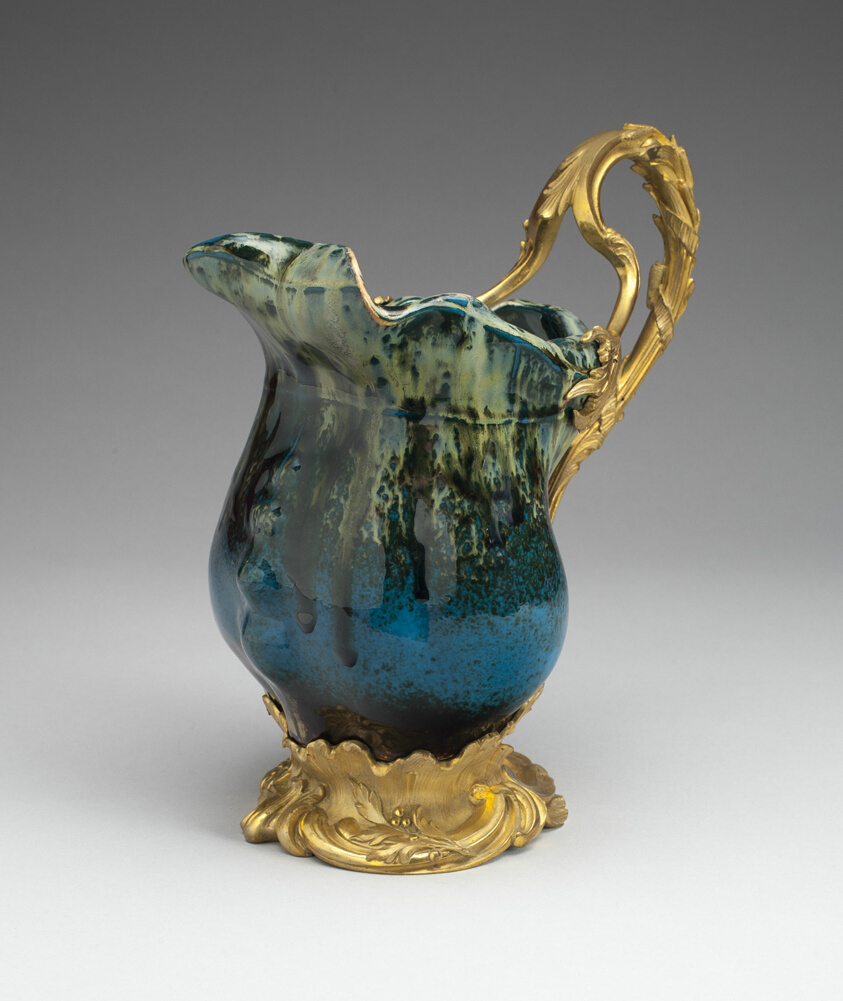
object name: Ceramics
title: Ewer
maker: Léonard-Agathon van Wydeveld (French, born Belgium, 1841–1923); Designed and made by Louchet Frères (French, active 19th century)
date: 1898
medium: Flambé-glazed pottery and gilt bronze mounts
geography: France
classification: ewer (vessel); vessel; porcelain; ceramics; european decorative arts